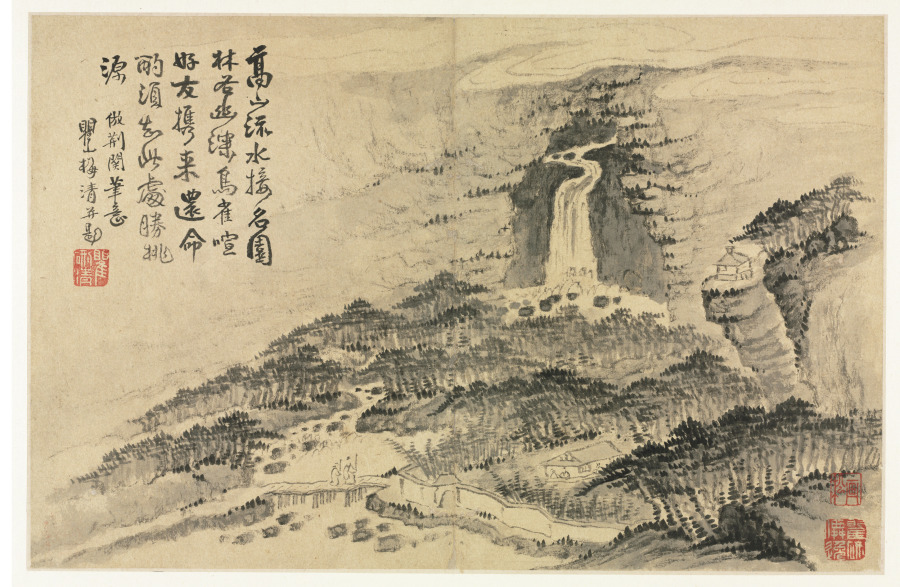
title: Landscapes after Various Styles of Old Masters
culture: China, Qing dynasty (1644-1911)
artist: Mei Qing (Chinese, 1623–1697)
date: 1690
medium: album leaf: ink and color on paper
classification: Painting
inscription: Summer Leaf II (formerly Leaf I). Artist's inscriptions, signature, and seals: Tall mountains and falling water adjoin a famous garden,/ In a wooded gorge, deep and remote, small birds chirp./ Old friends who bring me along and entertain me at a feast/ Should know this place is superior to the Peach Blossom Spring. Imitating Jing [Hao] and Guan [Tong] brush ideas. Mei Qing of Qushan [painted] and inscribed [seal] Quxing, Qing [2 seals, lower right corner] Huasong; Quxing hsien-i.